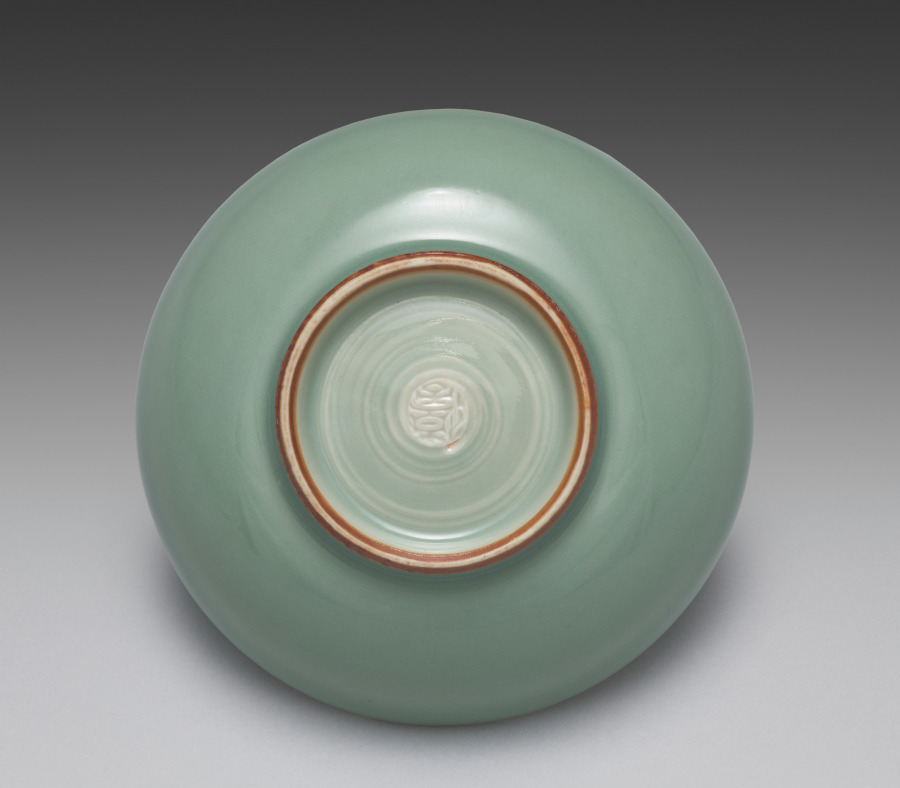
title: Dish from Dishes with Ivy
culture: Japan, Meiji period (1868–1912)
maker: Seifū Yohei III (Japanese, 1851–1914)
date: 1893–1914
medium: One from a set of five dishes; porcelain with green glaze and molded designs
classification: Ceramic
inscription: 清風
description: Yohei III’s main output for his sophisticated clientele was in the form of tea sets and dining sets. He often produced in pairs, sets of five, or sets of ten. This set of five dishes with a green glaze and designs of ivy vines in very low relief has unfortunately lost its box. These dishes are slightly larger than the other dishes, like CMA 2022.187, and so may have been not saucers but rather small plates for meals.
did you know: In his career, Seifū Yohei III created a range of dishes in green glazes.